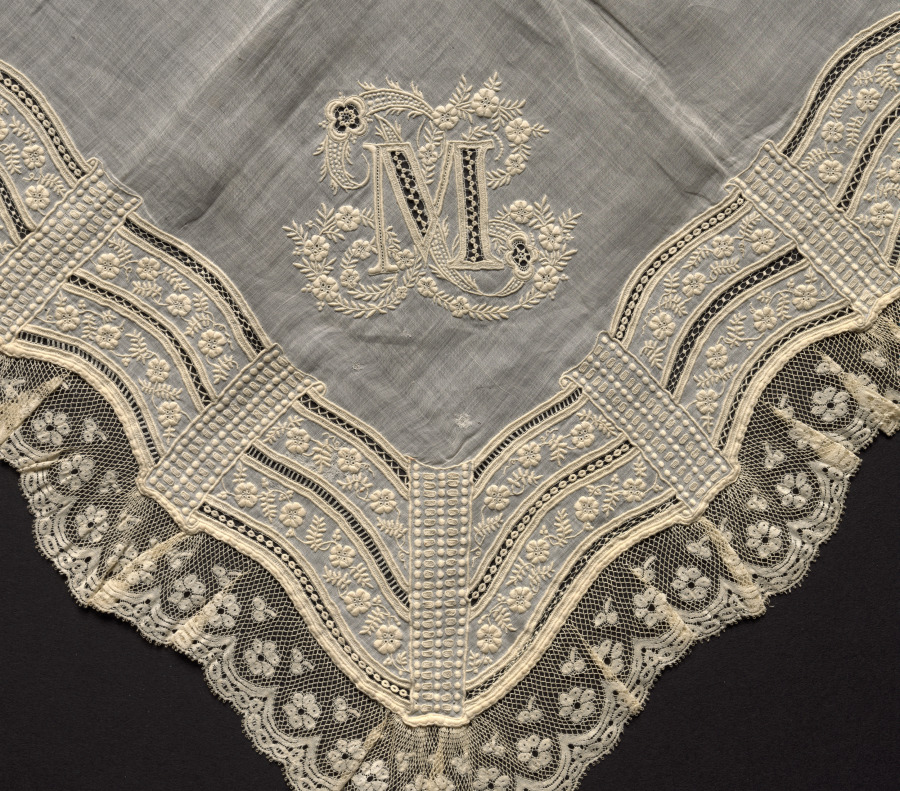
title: Lace Handkerchief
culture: France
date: 1800s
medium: linen ground: embroidery, lace edging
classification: Embroidery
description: The initial M is embroidered in one corner of this handkerchief.